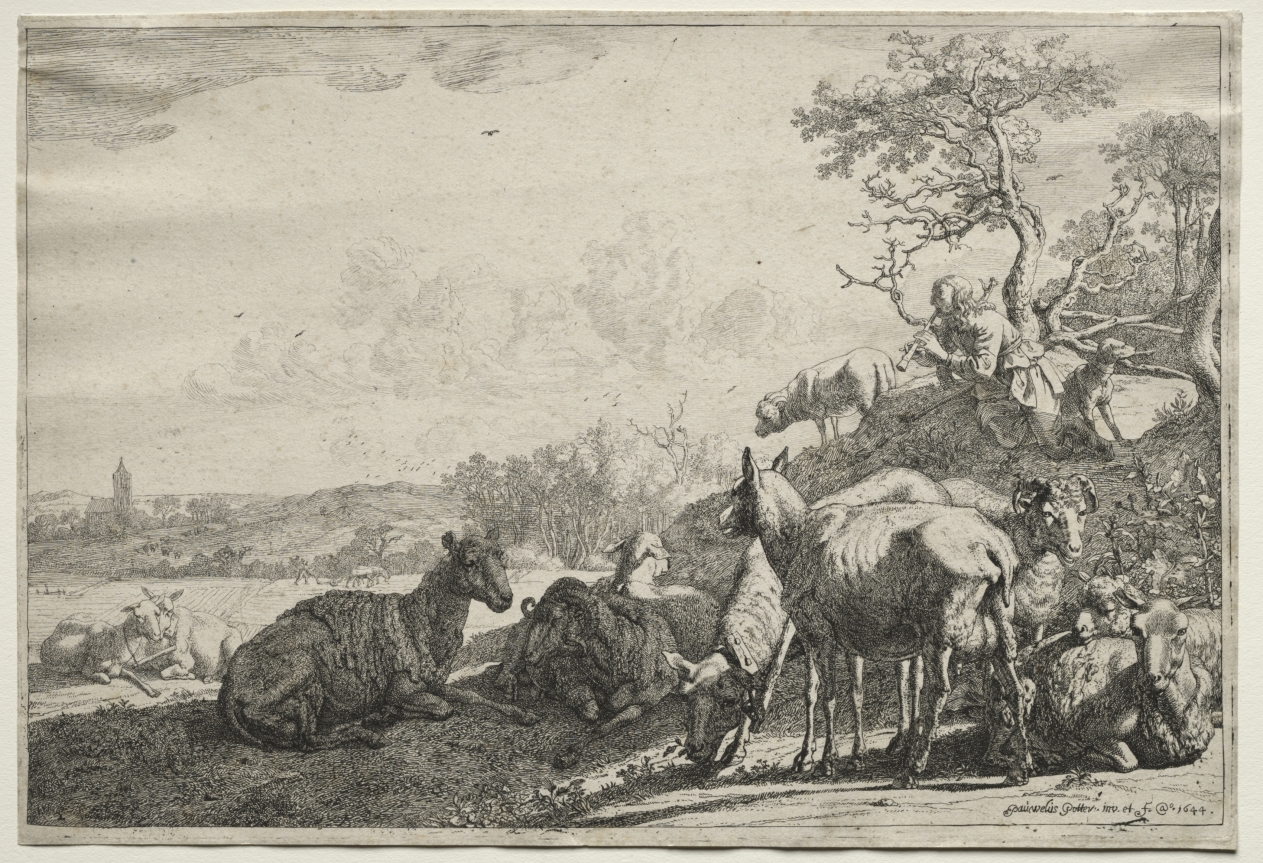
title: The Shepherd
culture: Netherlands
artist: Paulus Potter (Dutch, 1625–1654)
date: 1644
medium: etching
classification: Print